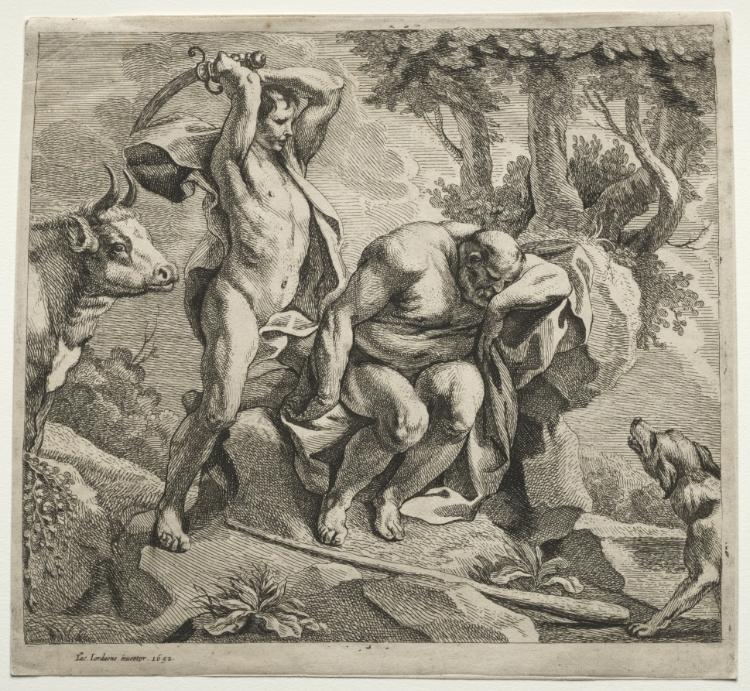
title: Mercury Killing Argus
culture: Flanders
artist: Jacob Jordaens (Flemish, 1593–1678)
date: 1652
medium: etching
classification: Print